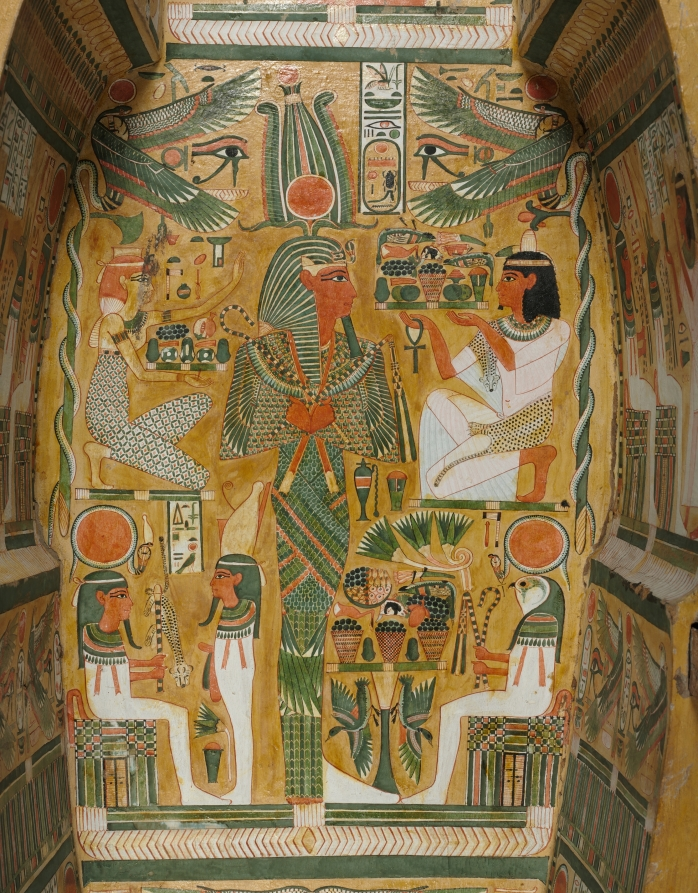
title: Coffin of Bakenmut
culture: Egypt, Thebes, Third Intermediate (1069–715 BCE), Dynasties 21–22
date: c. 1000–900 BCE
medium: gessoed and painted sycamore fig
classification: Funerary Equipment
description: The coffin of Bakenmut is one of the finest examples of painted wooden coffins made for the priests of Amen and their families at Thebes during Dynasty 21 and early Dynasty 22. The pharaohs of this time were no longer buried in the Valley of the Kings, but instead built tombs in the Delta, far to the north, where they resided. Security was lax in the Theban necropolis. The coffins and funerary goods of the wealthy citizens of Thebes were placed in unmarked and undecorated family tombs cut into the cliffs on the west bank of the Nile. All the care and detail that in more prosperous times were devoted to the decoration of the tomb chapel were now lavished on the elaborately painted coffins. Every available surface is crowded with religious scenes, images of funerary gods and goddesses, protective spells, and magical symbols. The deceased appears mummiform. An elaborate floral collar entirely covers the upper body, exposing only the separately attached hands (now lost). A pair of red "mummy braces" are crossed over the chest, their point of intersection marked by a winged sun disk. The lower body is covered with tiny figures modeled in gesso against a yellow background, which gives the effect of gold inlaid with glass or semiprecious stone. The decoration on the interior features two deified dead kings of Dynasty 18. Although these rulers had lived centuries before, memory of their greatness was still very much alive. The main scene near the top depicts Tuthmosis III, the great military pharaoh, who lived 500 years before Bakenmut. Posed as a mummy, the ruler wears a brilliant feathered garment enfolding him with falcon’s wings. The scene below features back-to-back seated images of Amenhotep I, regarded as the patron of the Theban cemetery and worshiped as a local god there.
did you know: Originally another smaller coffin was placed inside this outer coffin and in that the deceased with a mummy board would have rested.